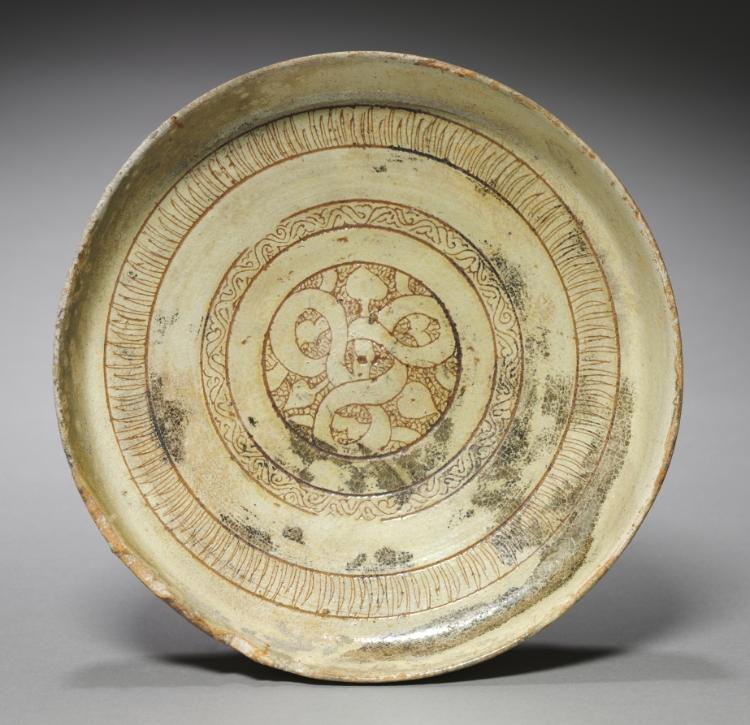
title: Deep Plate with Decorative Patterns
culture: Byzantium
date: 1100s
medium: sgraffito earthenware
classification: Ceramic